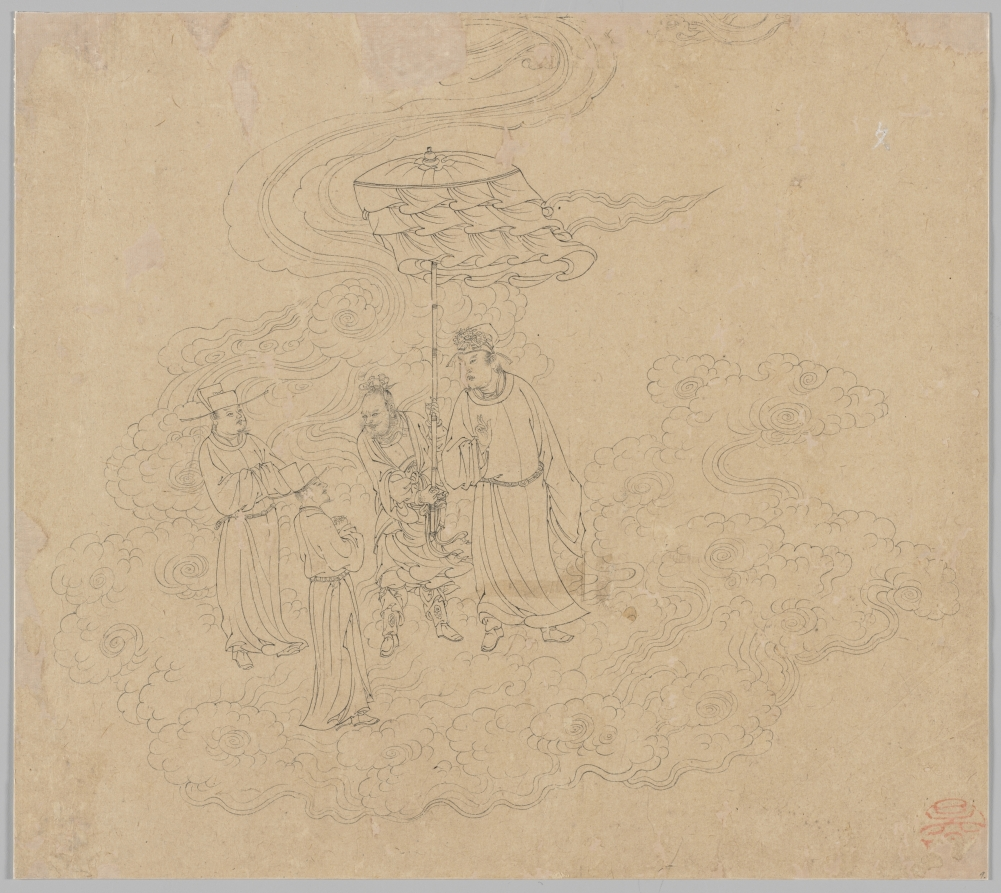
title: Album of Daoist and Buddhist Themes: Procession of Daoist Deities: Leaf 9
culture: China, Southern Song dynasty (1127-1279)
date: 1200s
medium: Album, ink on paper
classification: Painting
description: This extraordinary album has 50 paintings on a variety of religious subjects. They were likely created by several master craftsmen to share with studio apprentices as models for fulfilling commissions. The Jade Emperor and the Daoist pantheon make up the first 26 leaves. The next 14 leaves portray the Buddhist Ten Kings of Hell administering punishments to the dead. The third section, called “Clearing the Mountains,” features divine soldiers, led presumably by the deity Erlang Shen 二郎神, fighting undesirable creatures.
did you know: A divine lord, likely one of the Five Emperors, is escorted by three attendants.